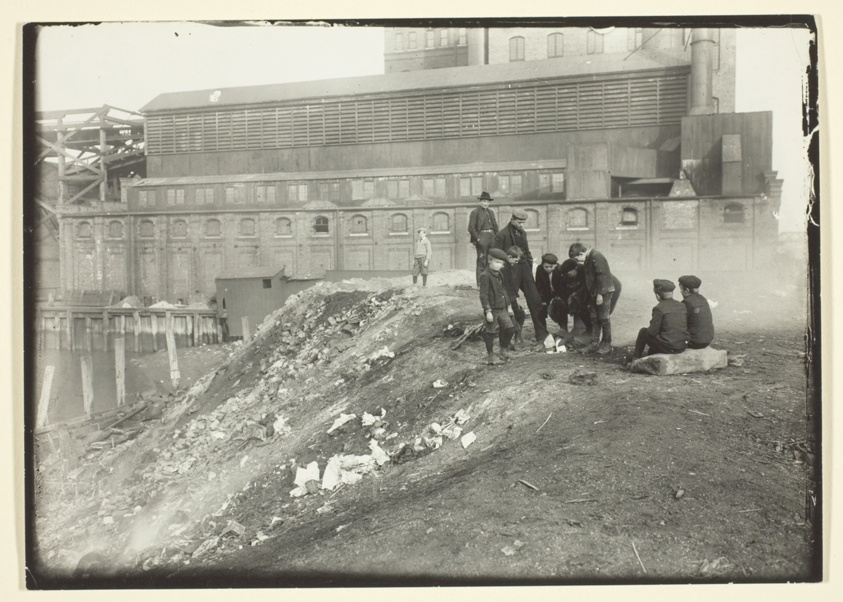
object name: Photograph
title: Gang Rendevous, Yonkers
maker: Lewis Wickes Hine (American, 1874–1940)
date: 1906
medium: Gelatin silver print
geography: United States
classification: gelatin silver (developing-out-paper) pr; photographic process; photography; photograph